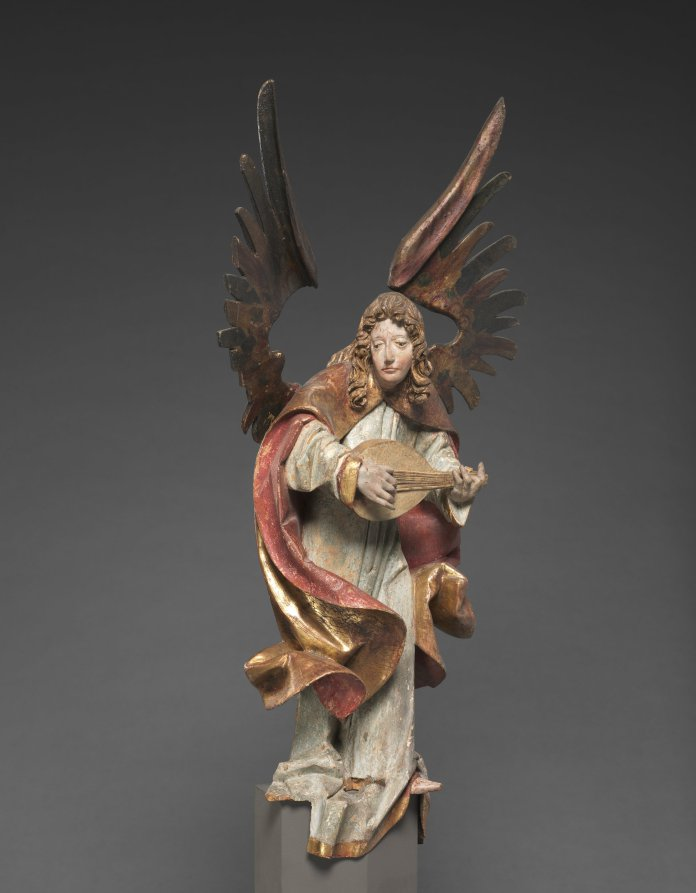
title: Lute-playing Angel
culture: Austria, Tyrol, early 16th Century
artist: Hans Schnatterpeck (Austrian)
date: made shortly after 1503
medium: Black Forest balsalm fir with polychromy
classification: Sculpture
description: This sculpture was originally placed at the top of the altarpiece of the high altar in the church at Nieder Lana, near Meran, in the South Tyrol (now part of present-day North Italy). The sculptor had contracted in 1503 to complete this altar within eight years for the payment of 1,600 gilders. Hans Schnatterpeck was originally from Landsberg am Lech in Bavaria. By 1478-79 he had settled in Meran where he operated the leading workshop in the area. This angel is a surviving element from his most famous work, the largest Gothic altarpiece of the Alpine region. Other elements survive in various public and private collections.